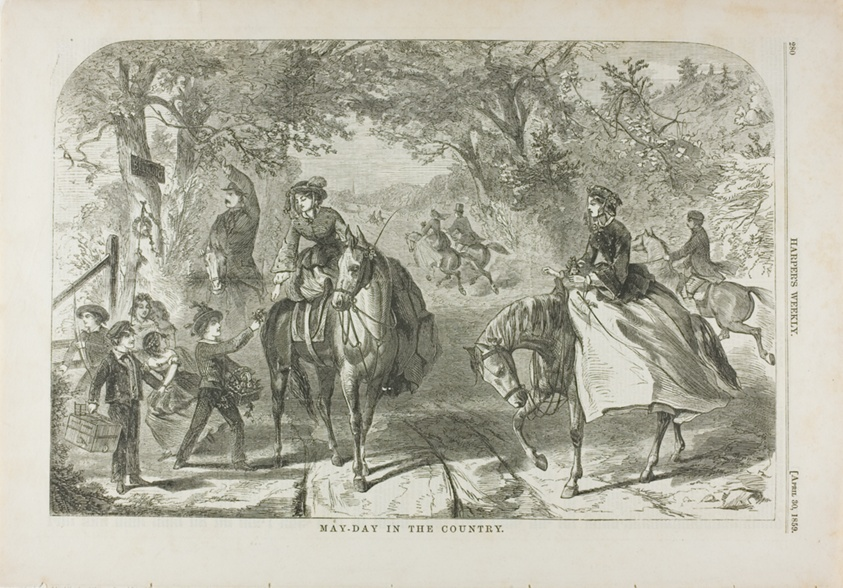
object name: Print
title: May-Day in the Country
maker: Winslow Homer (American, 1836-1910); published by Harper's Weekly (American, 1857-1916)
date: published April 30, 1859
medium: Wood engraving on paper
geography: United States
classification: wood engraving; print; prints and drawing